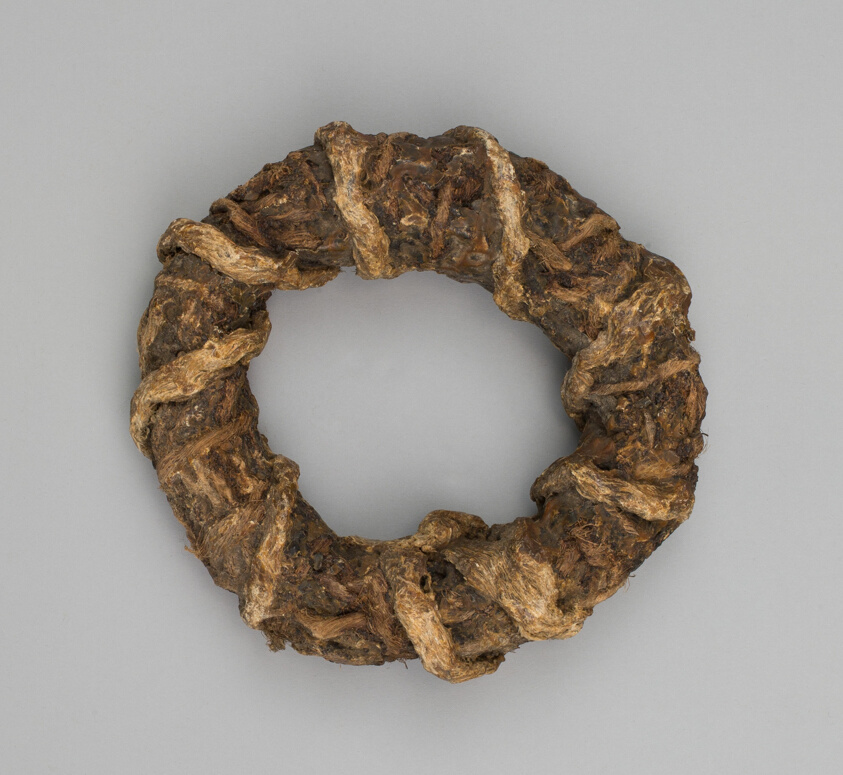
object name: Arms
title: Incendiary Quoit (Throwing Ring)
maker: Austrian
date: 17th Century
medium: Pitch-covered material, match cord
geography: Austria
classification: arms and armor, miscellaneous; arms and armor; arms